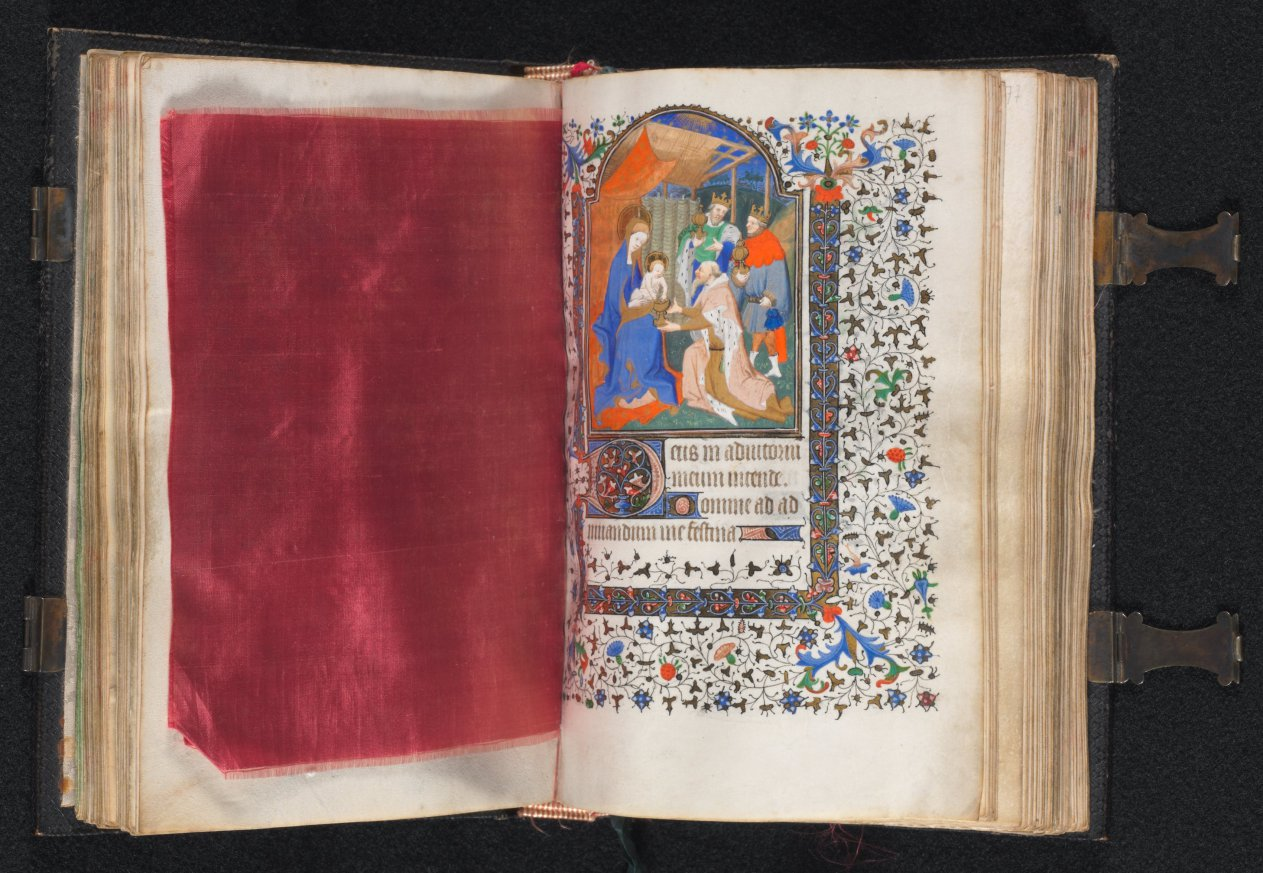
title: Book of Hours (Use of Paris): Fol. 66v, Decorated Border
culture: France, Paris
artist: possibly studio or workshop of The Bedford Master (French, Paris, active c. 1405–30)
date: c. 1420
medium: ink, tempera, and gold on vellum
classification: Bound Volume